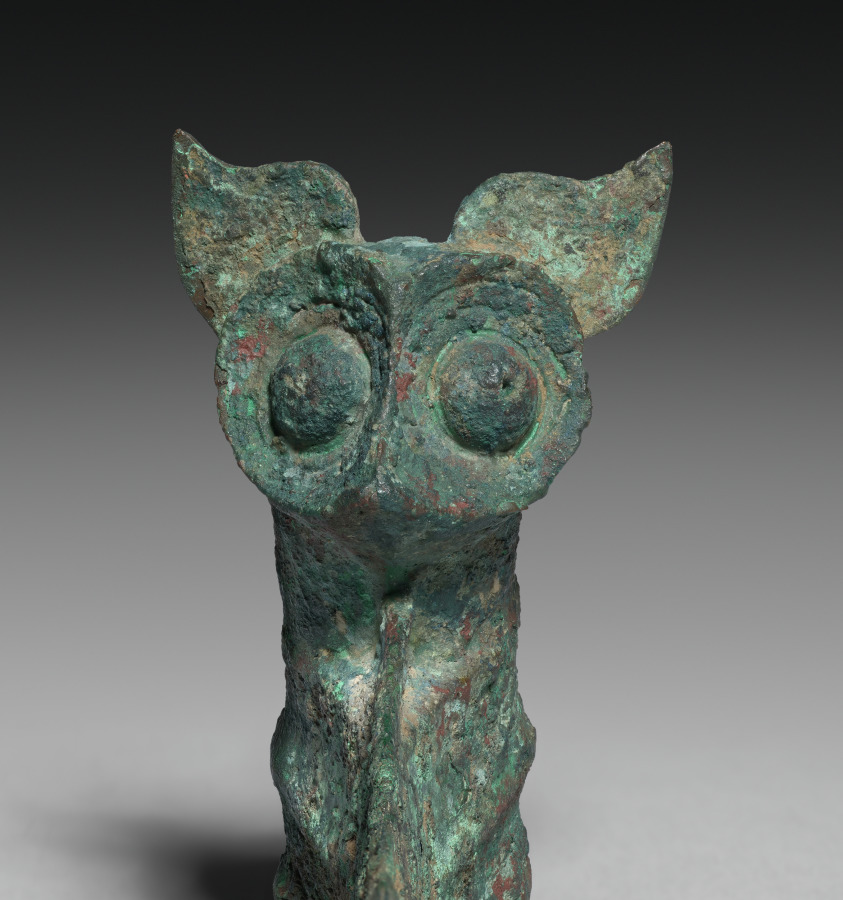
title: Axe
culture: China, Shang dynasty (c. 1600–c. 1046 BCE)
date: 1766–1045 BCE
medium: bronze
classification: Metalwork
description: The head of an owl with large eyes and ears, sitting above the blade of a halberd-axe, may have deterred evil and harm from its carrier. Whether such an axe was used in ritual or warfare is not clear.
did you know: A staff or pike would have attached to the blade via the socket below the owl's head.